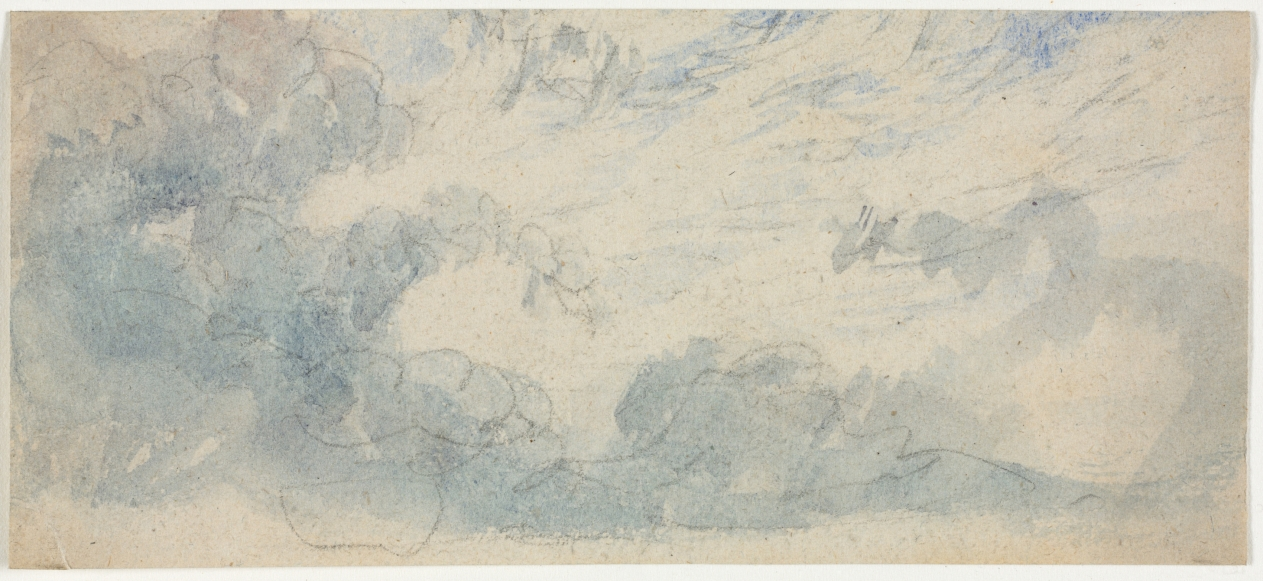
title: Cloud Study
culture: England, 19th century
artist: Anonymous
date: 1800s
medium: watercolor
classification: Drawing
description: Many English watercolorists of the period were especially interested in capturing natural effects of the landscape, such as cloud formations. Such studies were of particular interest to the French Impressionists.